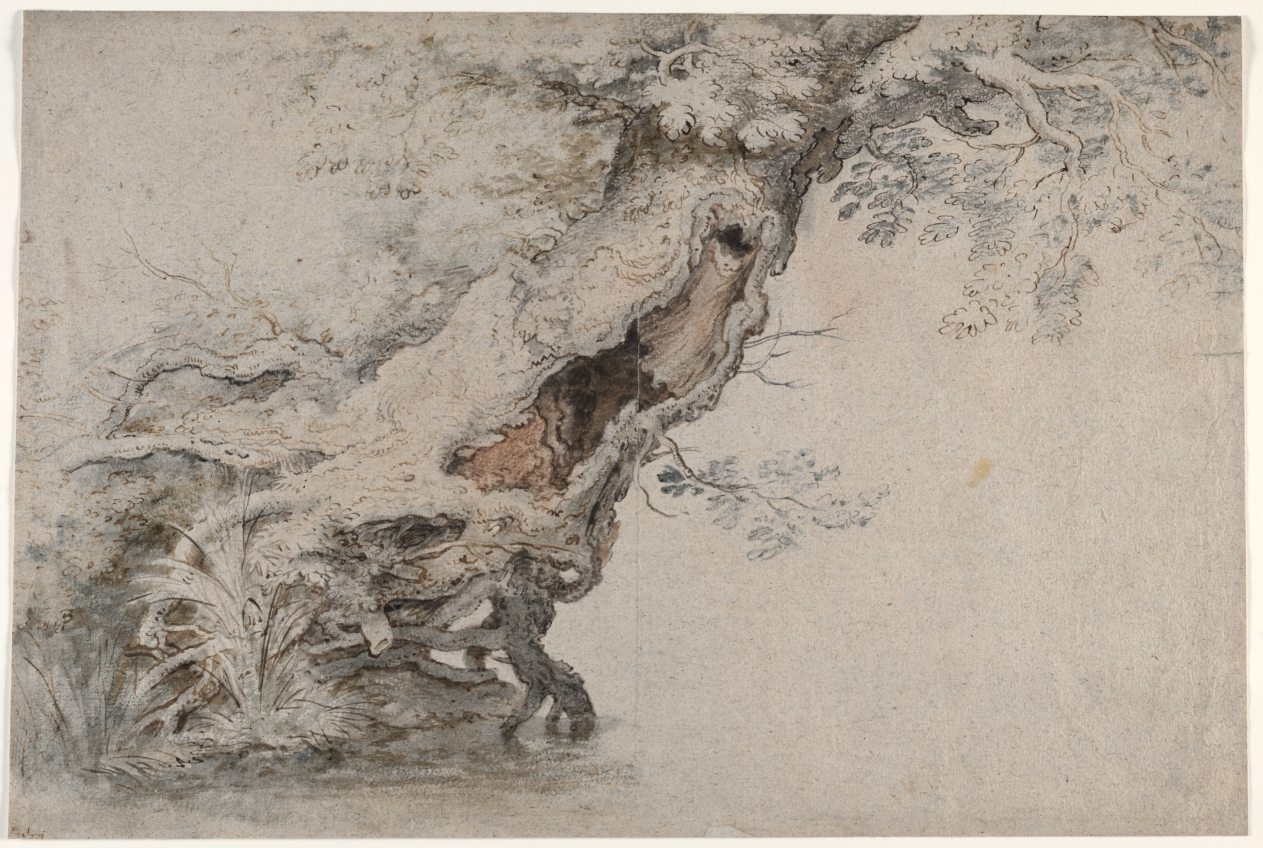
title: Hollow Tree, after Roelant Savery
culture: Netherlands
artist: Lambert Doomer (Dutch, 1623–1700)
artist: copy after Roelant Savery (Flemish, 1576–1639)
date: after 1670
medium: pen and black and brown ink, black chalk, and brush and green, brown, and orange wash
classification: Drawing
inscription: lower left, in brown ink: Saverij ; VERSO, upper center, in graphite: oblong ; lower left, in graphite: [illegible, partially erased] ; lower left, in graphite: Roland Savery 1576-1639 / (pupil of his brother Jan Savery ; lower center, in graphite: [illegible] / clip 1/2" left 1 1/2" [r]ight ; ON FRAGMENT OF OLD BACKING (now removed), on a seperately applied piece of paper, printed in black ink: MATH[IAS K]OMAR [cropped] / WORKS OF ART / Q840 [inscribed in black ink] / NEW YORK ; in black ink: Roland Savery / 1576-1639 / Ex. Coll. Dr. Ginsburg (L. 1145) / Reitlinger ; in graphite: Lugt. Supplt 2274a ; ON ANOTHER FRAGMENT, in graphite: R. Savery